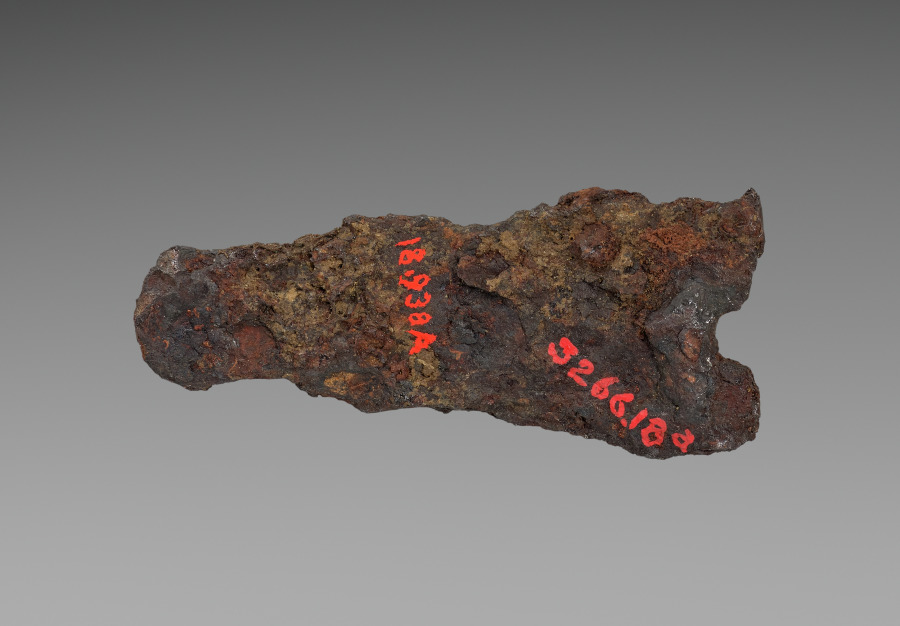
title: Buckle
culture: Merovingian, Burgundian, Migration period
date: 600s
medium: iron with gold and silver overlay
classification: Jewelry